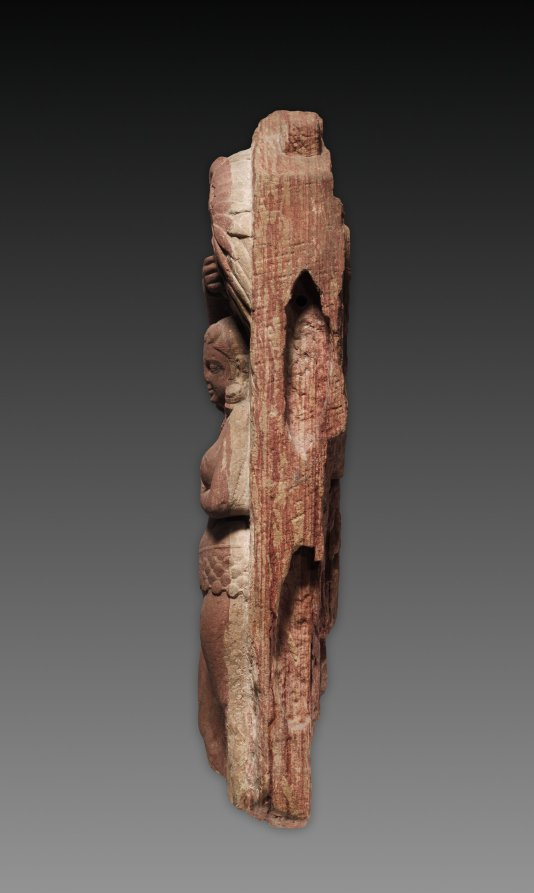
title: Railing Pillar with a Yakshi (Female Nature Divinity)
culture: Northern India, Mathura, Kushan period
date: c. 125–50 CE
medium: red sandstone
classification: Sculpture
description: This pillar would have been an upright of a stair banister, probably leading to an upper circumambulatory path of a Buddhist or Jain sacred monument known as a stupa. It has the image of a nature divinity grasping the branch of an ashoka tree with one hand and touching her breast full of nourishing milk with the other. The reverse side of the pillar is decorated with a stupa at the top and a partially damaged scene set in the architectural framework below.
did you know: Flowers of the ashoka tree (saraca asoca) are bright red.